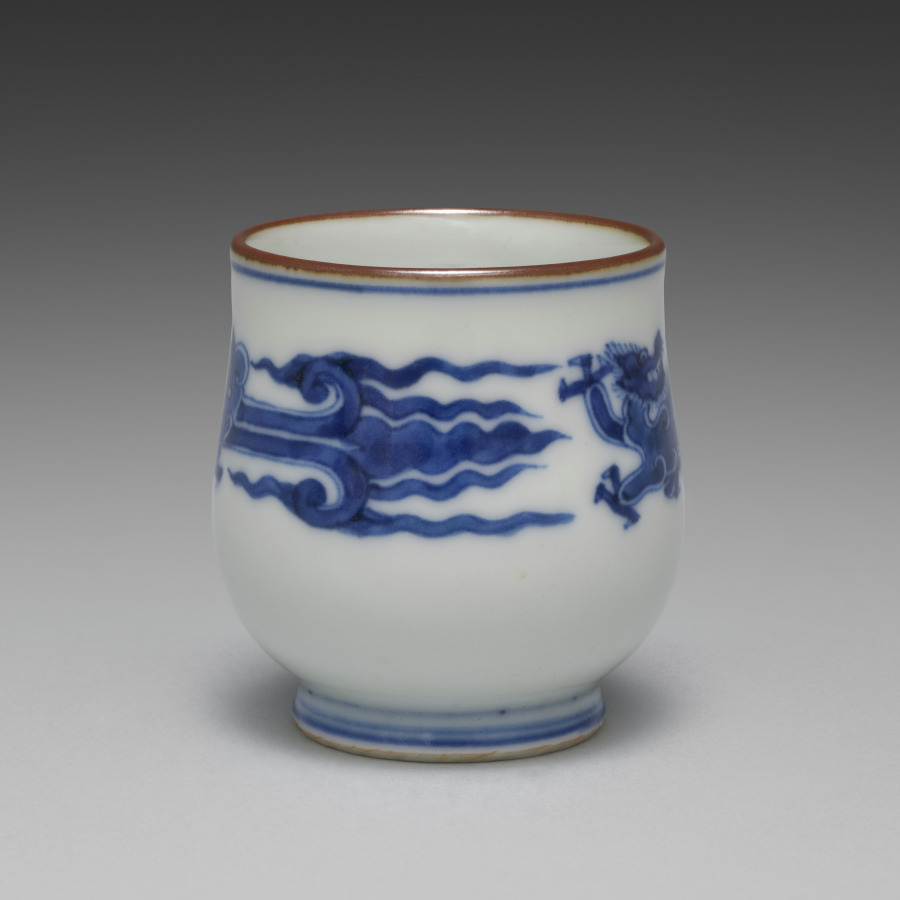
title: Cup from Sake Cups with Dragons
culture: Japan, Meiji period (1868–1912)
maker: Seifū Yohei III (Japanese, 1851–1914)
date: c. 1893–1914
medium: One from a set of six sake cups; porcelain with underglaze blue and iron oxide rims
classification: Ceramic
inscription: 大日本清風造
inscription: 清風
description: Each of these sake cups pictures two backward-looking dragons. The highly stylized creatures resemble jade carvings.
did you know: Seifū Yohei III was inspired by the Chinese mythical animals that were common on porcelain objects made at Jingdezhen in China during the Ming dynasty (1368–1644) and then exported around the world.